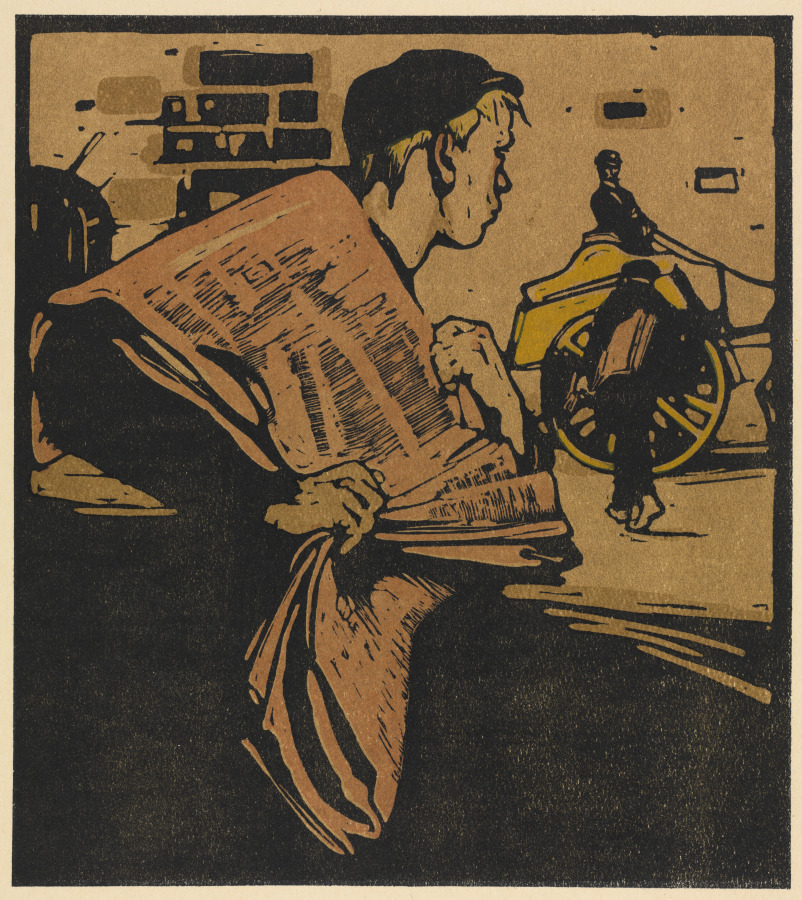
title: London Types: Newspaper Boy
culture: England, 19th century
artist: William Nicholson (British, 1872–1949)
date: 1898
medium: color lithograph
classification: Print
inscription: Lower margin, center, in pencil (not artist's hand): "9-15-114."